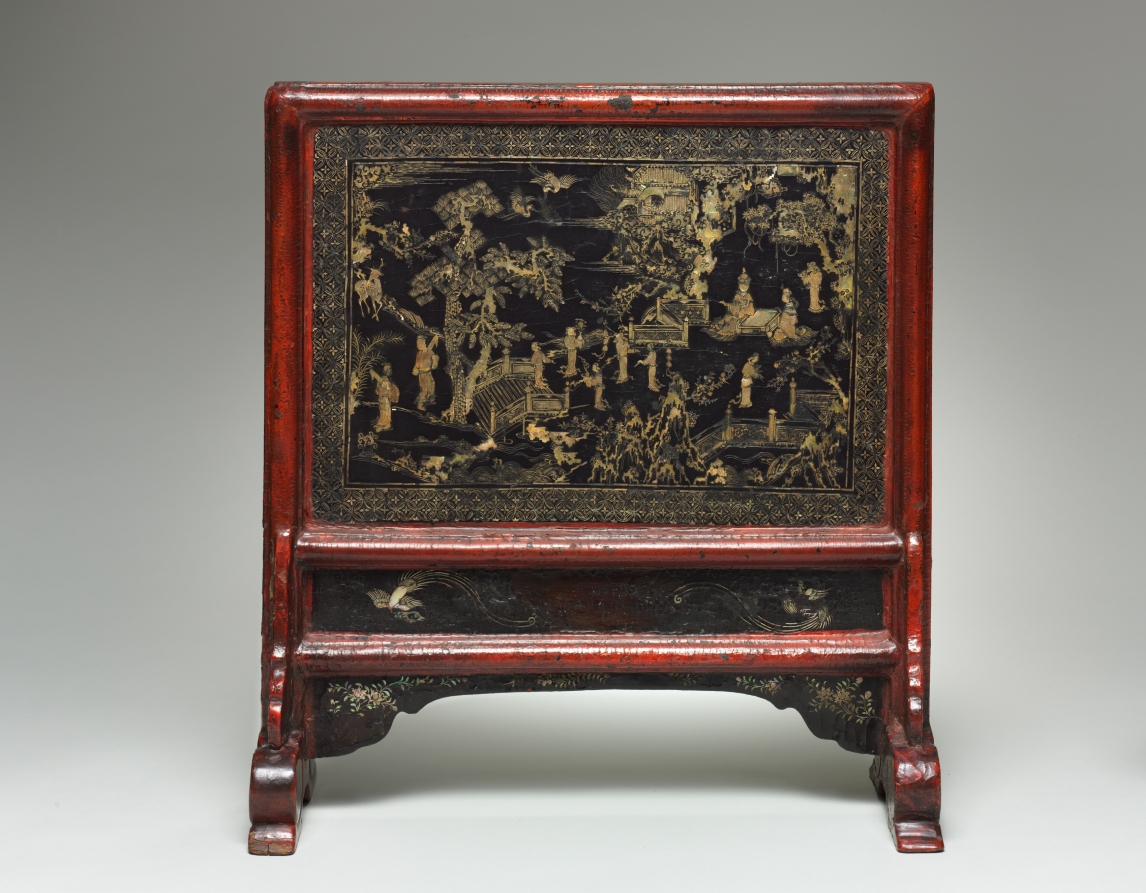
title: Table Screen: The Peach Blossom Spring, Land of the Immortals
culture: China, Yuan dynasty (1271-1368)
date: 1300s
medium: lacquer on wood with mother-of-pearl inlay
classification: Lacquer